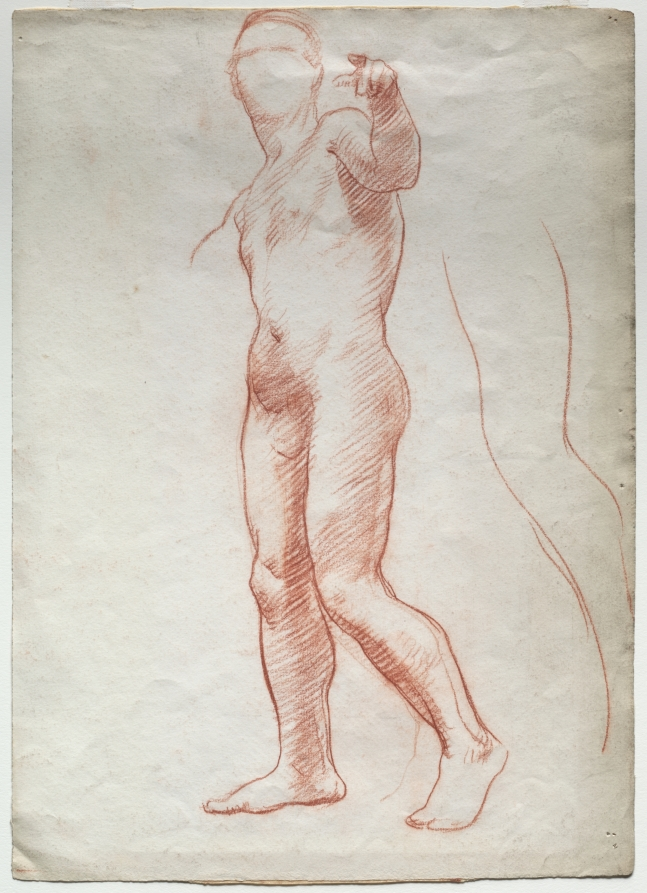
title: Standing Male Nude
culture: England(?), 20th century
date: first half 1900s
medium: red chalk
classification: Drawing